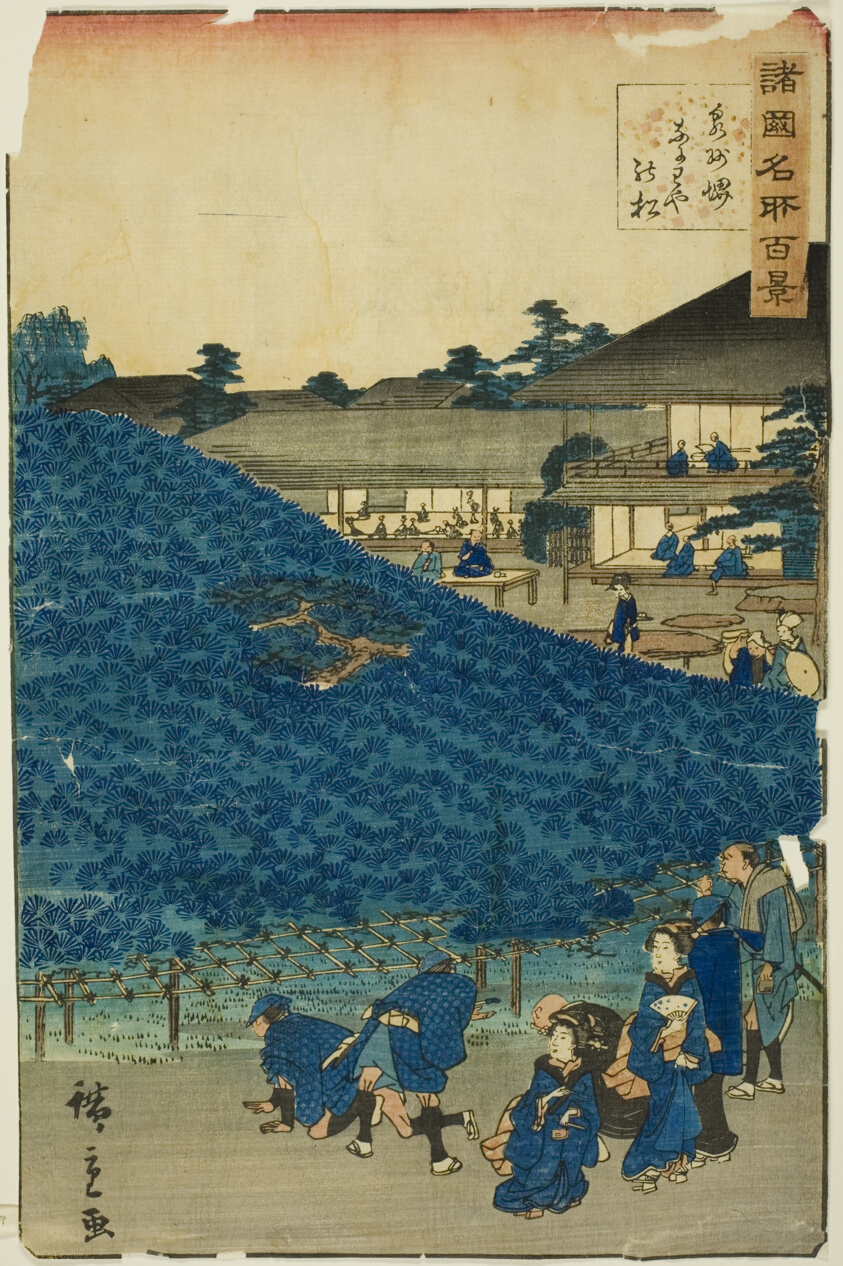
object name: Print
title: The Naniwaya Pine Tree at Sakai in Izumi Province (Senshu Sakai Naniwaya no matsu), from the series "One Hundred Famous Views in the Various Provinces (Shokoku meisho hyakkei)"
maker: Utagawa Hiroshige II (Shigenobu) (Japanese, 1826–1869)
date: 1859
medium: Color woodblock print; oban (trimmed)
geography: Japan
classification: print; asian art